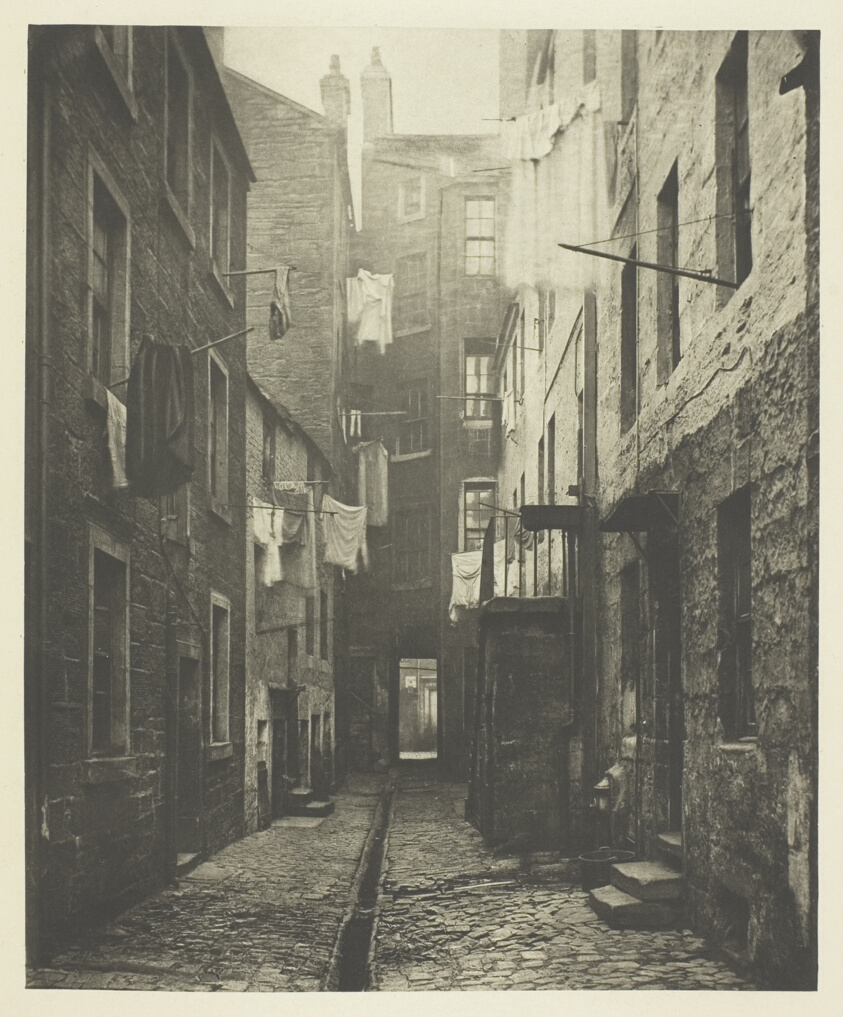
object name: Photograph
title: Close No. 75 High Street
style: 19th century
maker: Thomas Annan (Scottish, 1829–1887)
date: 1868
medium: Photogravure, plate 12 from the book "The Old Closes & Streets of Glasgow" (1900)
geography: Scotland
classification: photograph; photography